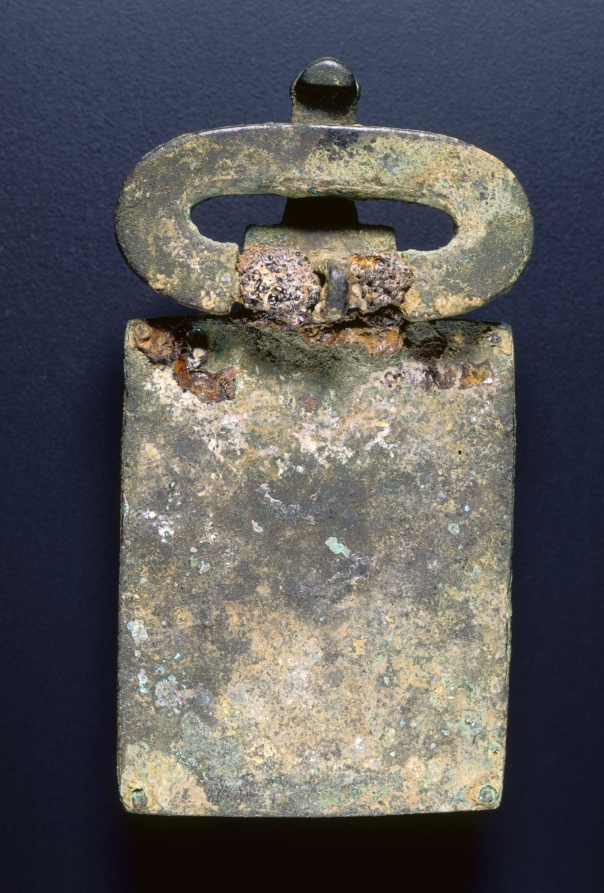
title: Belt Buckle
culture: Visigothic, Spain, Migration Period, 6th century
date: c. 525–560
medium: bronze with garnets, glass, mother of pearl, gold foil, traces of gilding; bronze and glass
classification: Jewelry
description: The art of the European Migration Period (3rd-7th centuries AD) is almost exclusively one of personal adornment-a portable art that followed men and women to their graves. Belt buckles with large rectangular attachment plates have been discovered in cemeteries across the Iberian Peninsula-now occupied by Spain and Portugal-from the period of Visigothic occupation (about AD 412-711). Their decoration varies. Finer examples, like this one, are distinguished by brilliantly inlaid semi-precious stones and colored glass. Garnets were especially prized in Visigothic society for use in cloisonné jewelry. The technique involved the fitting of carefully cut pieces of polished garnet into an intricate grid of compartments, or cloisons. This buckle is so densely inlaid with garnets that it presents a virtual "carpet" of red to the eye. These large Visigothic buckles are strikingly uniform in shape yet endlessly varied in surface design, perhaps a sign that they expressed the personal identities of their original owners. Grave excavations have shown that belt buckles of this type were made for women.